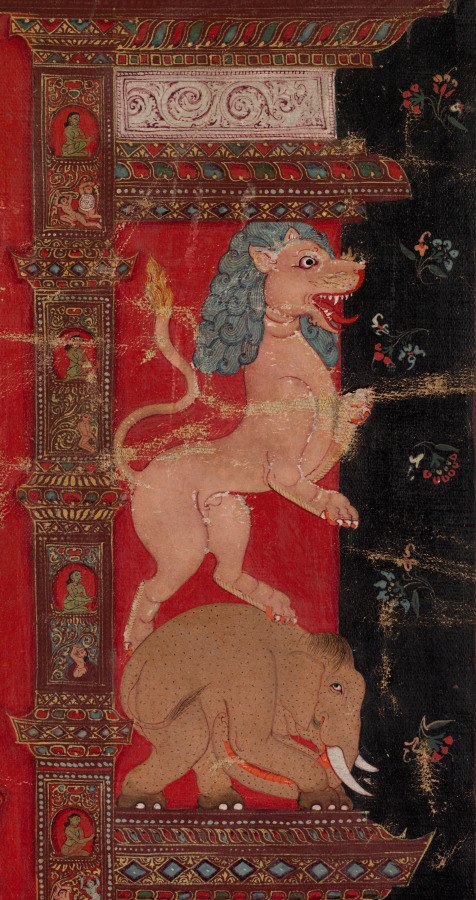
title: Green Tara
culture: Central Tibet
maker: attributed to Aniko (Nepalese, active in Tibet mid- to late 1200s)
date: c. 1260s; mounted, 2020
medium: thangka; gum tempera, ink, and gold on sized cotton; mount: silk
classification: Painting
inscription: Om Ah Hum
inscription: om tare tutare ture svaha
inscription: Om Ah Hum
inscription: Om Ah Hum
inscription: om ah sarva vyida svaha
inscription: ye dharmā hetuprabhavā he- tuṃ teṣāṃ tathāgato hy avadat teṣāṃ ca yo nirodha evaṃvādī mahāśramaṇaḥ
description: For Tibetans, Green Tara is one of the preeminent figures of their Buddhist faith, a radiant savioress who embodies the female form of the perfect, enlightened mind. The Green Tara in the Cleveland thangka—a Tibetan devotional painting on cloth—specifically dispels fear and provides protection, just like her mantra inscribed on the back side of the painting. Her green color and fear-not gesture link her to the cosmic Buddha of the North, enshrined above her head. Most scholars agree that this work was painted by the celebrated Nepalese artist known as Aniko.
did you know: The tiny monastic figure under Green Tara's right hand commissioned the painting.